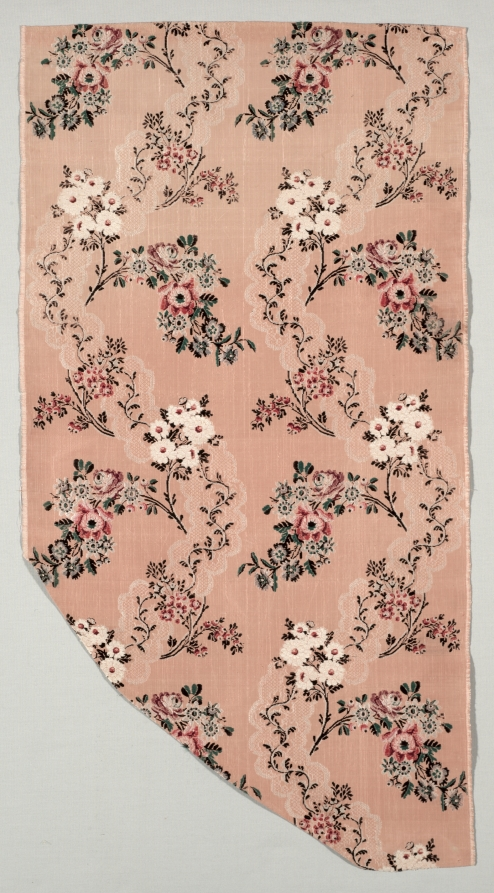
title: Length of Textile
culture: France, 18th century, Period of Louis XV (1723-1774)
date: 1723–1774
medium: brocade, silk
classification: Textile